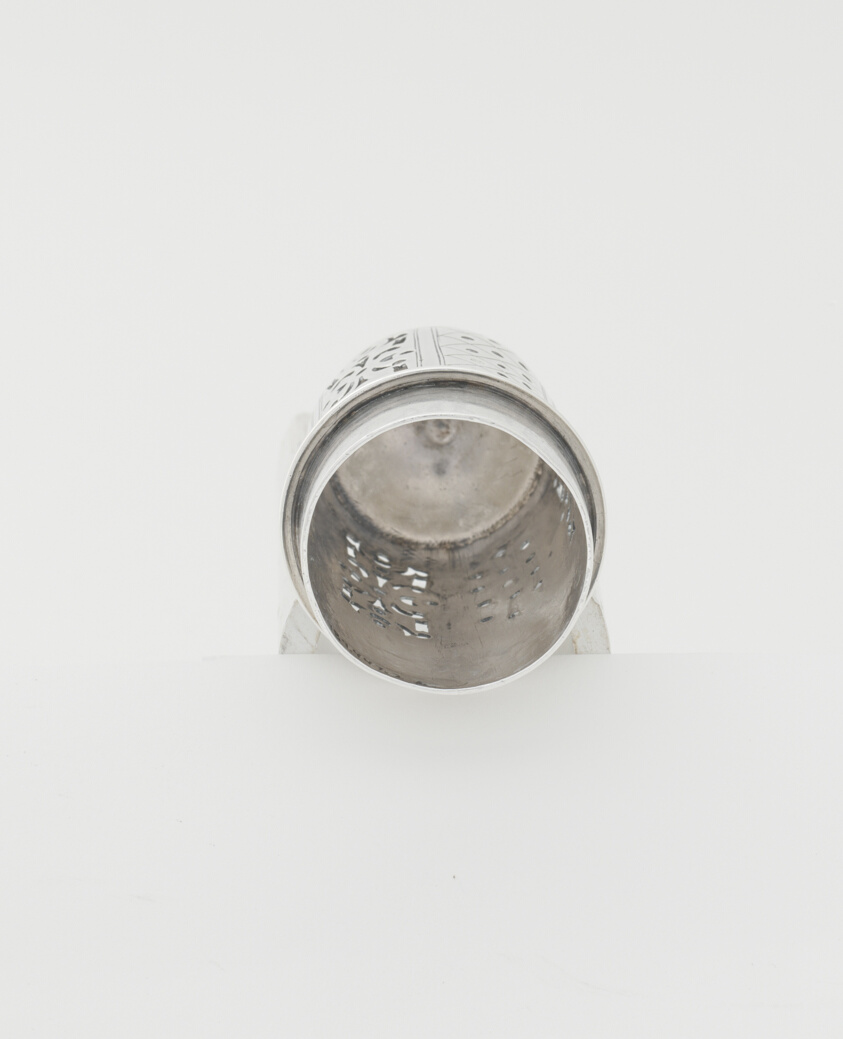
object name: Metalwork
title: Pair of Casters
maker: Attributed to Jacob Hurd; American, 1702/03–1758; Boston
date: 1740–50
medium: Silver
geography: Boston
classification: condiment vessel; silver; american decorative arts; american arts; decorative arts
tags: dining, drinking